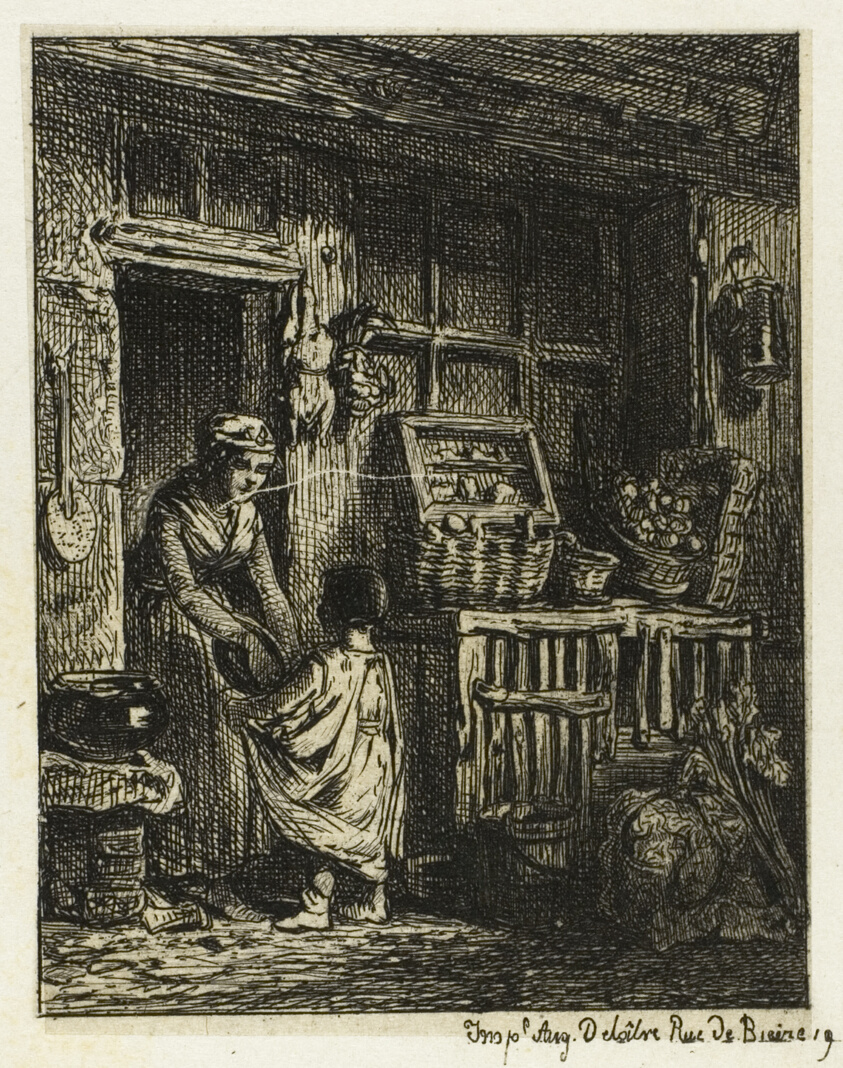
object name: Print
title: The Fruit Merchant and the Child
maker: Charles Émile Jacque (French, 1813-1894)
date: 1844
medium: Etching and drypoint on cream China paper laid down on ivory wove paper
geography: France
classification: etching; print; prints and drawing